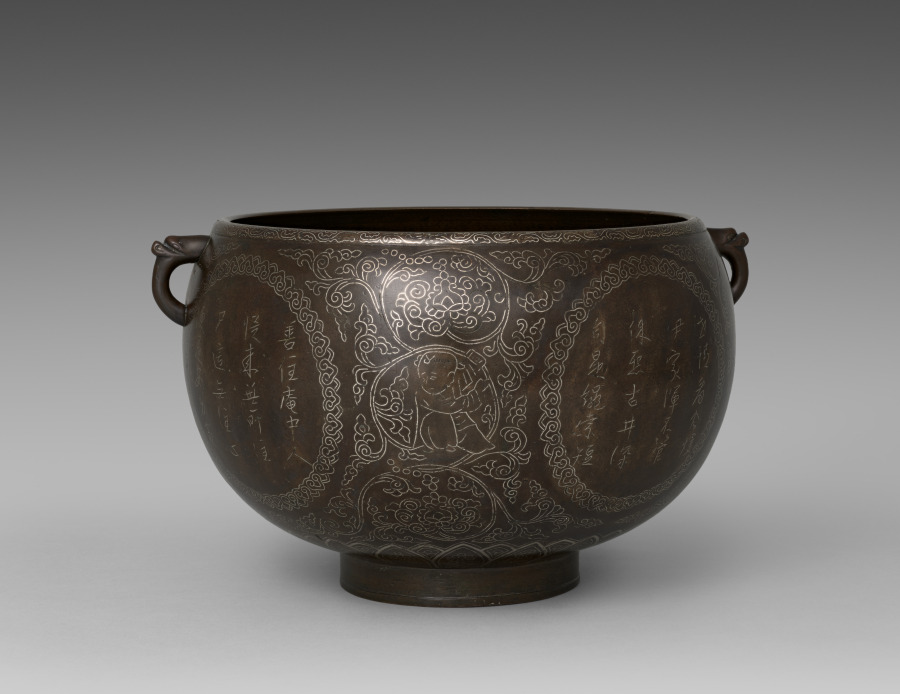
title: Basin with Inscribed Figures and Calligraphy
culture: Korea, Goryeo dynasty (918–1392)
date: 1100s–1200s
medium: bronze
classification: Metalwork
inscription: Each of the three roundels contain five-character, four-line poems with Buddhist messages.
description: This bronze basin may have been used for containing purified water. What makes this work charming is its intricate decoration done in silver inlay: the five-character, four-line poems interspersed among images of a child. The poems, which evoke the concept of nonattachment and nonduality, were written by Buddhist monks.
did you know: A child, one of the main decorative elements for this basin, is possibly a young Buddhist pilgrim named Sudhana, who took a long spiritual journey to search for enlightenment.